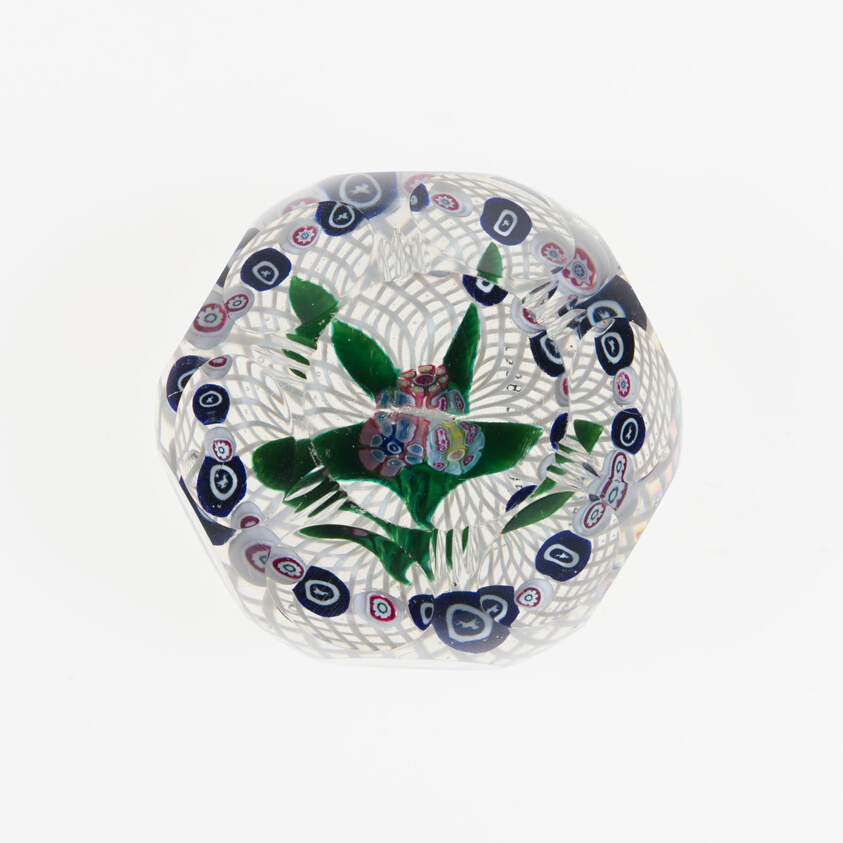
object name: Glass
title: Paperweight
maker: Boston and Sandwich Glass Company (Sandwich, Massachusetts, 1826-1888)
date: Late 19th century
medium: Glass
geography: United States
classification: paperweight; glass